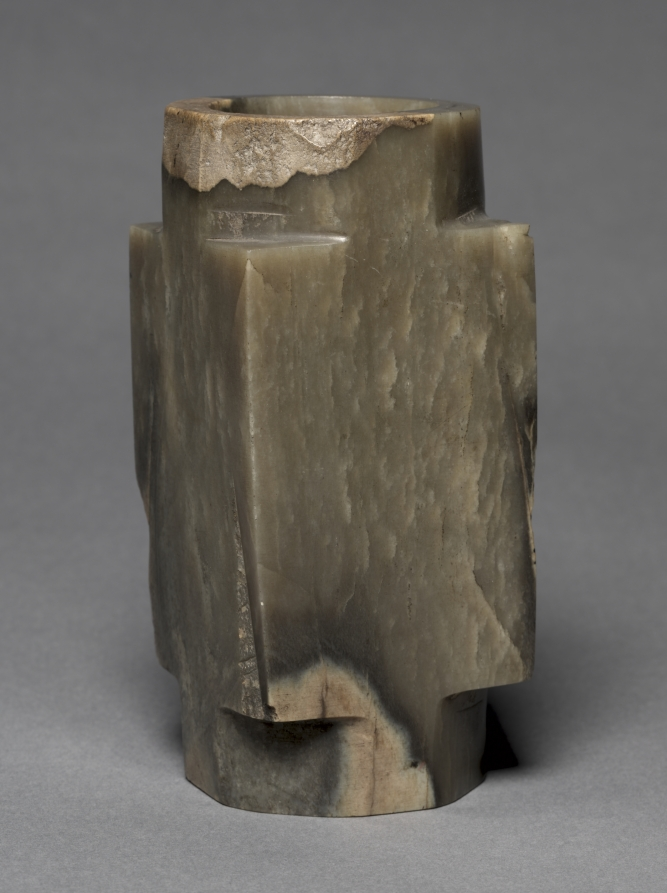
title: Ceremonial Tube (Cong)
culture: China, Shang dynasty (c. 1600–c. 1046 BCE)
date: c. 1600–1056 BCE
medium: jade (nephrite)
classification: Jade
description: The cong, a cylindrical tube with a square outer section, was one of the most impressive jade implements used in ancient rites. The ritual text Rites of Zhou mentions the use of the cong for the worship of the earth. However, its function and meaning in the earlier Neolithic societies are not completely understood.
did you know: The Interior cavity of this piece of jade was bored from both ends, making an irregular ridge near the center.